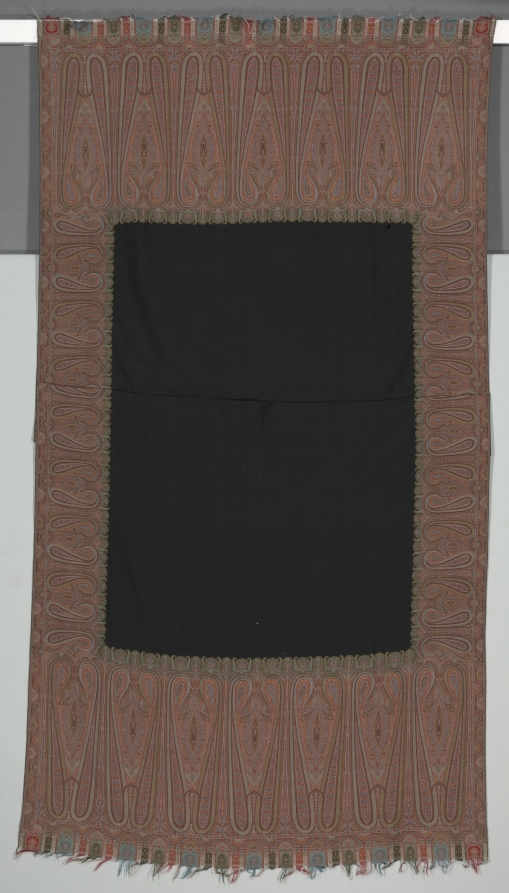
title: Shawl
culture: France, Nimes ?, 19th century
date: c. 1860s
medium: wool, compound weave, additional weft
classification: Textile